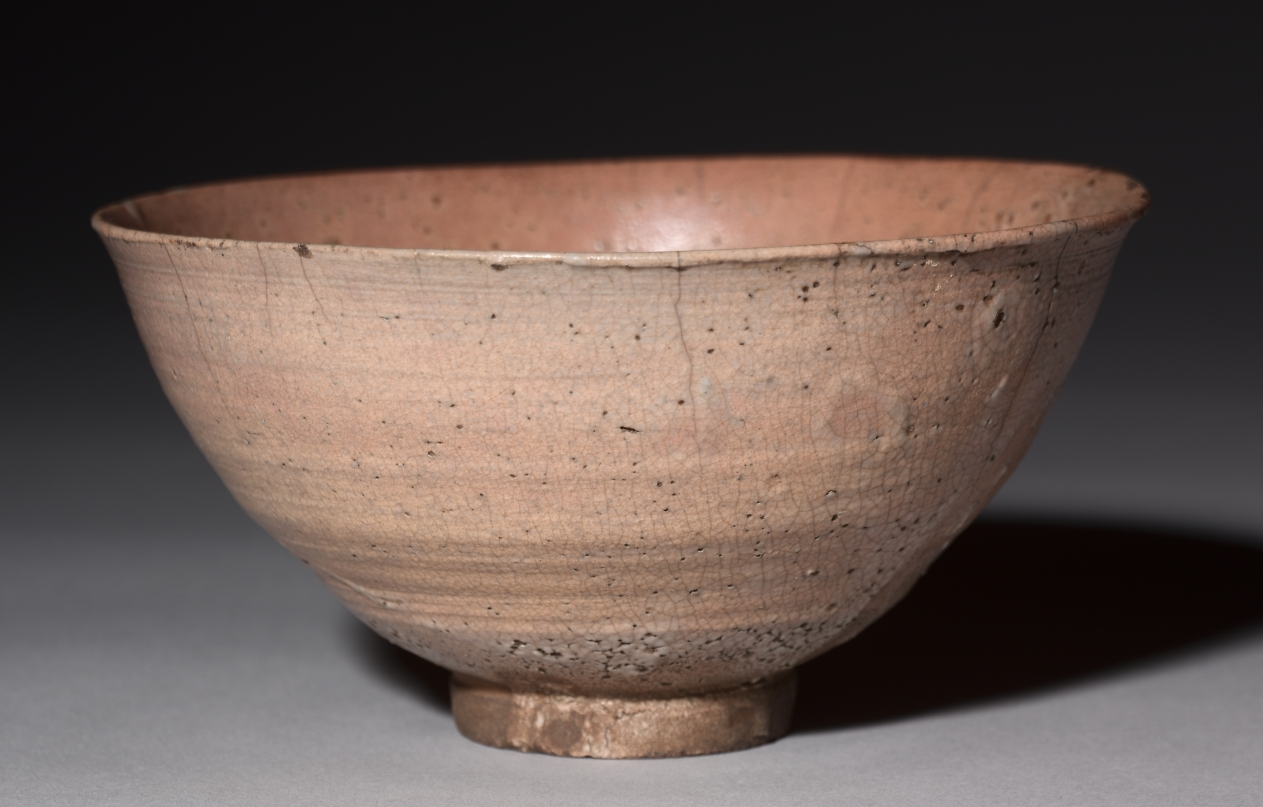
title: Tea Bowl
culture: Japan, Momoyama period (1573–1615)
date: c. 1600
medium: Glazed stoneware (Karatsu ware)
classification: Ceramic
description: Wide-mouthed bowls were used for consuming whipped tea such as that imbibed during the tea ceremony. Karatsu ware like this was among the most prized of such tea bowls. The port city of Karatsu in Saga prefecture in Kyushu was known for its kilns that produced high-fired, Korean-style glazed pottery. The Japanese ruler Toyotomi Hideyoshi invaded Korea in 1592 and 1597, returning with families of Korean potters as spoils of war. This region was one of the sites where these potters were resettled.